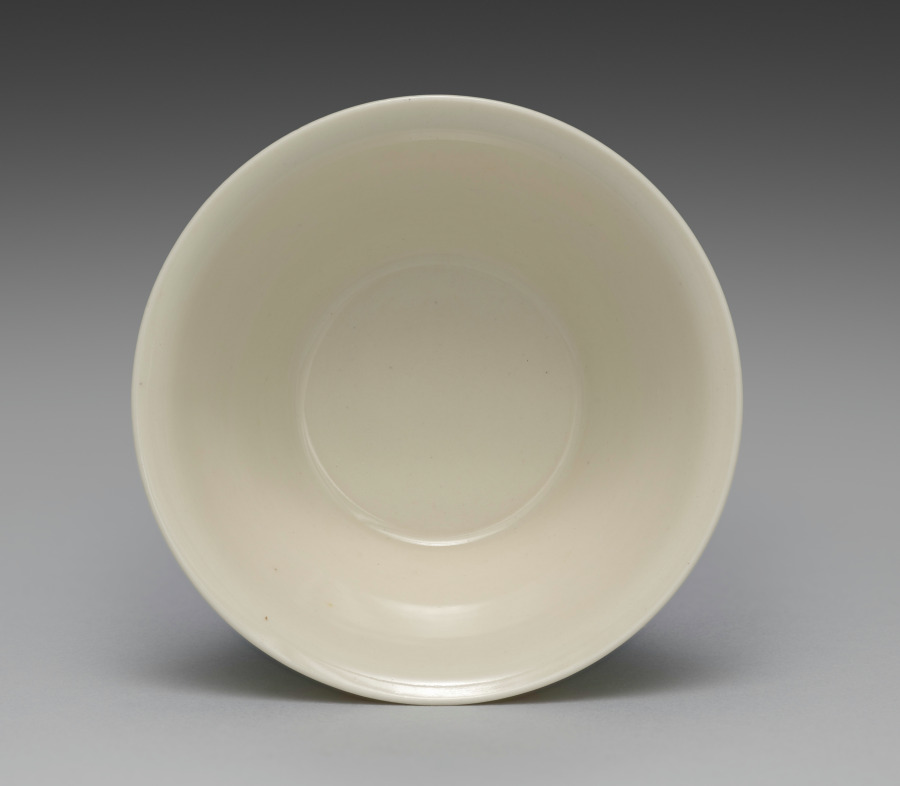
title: Teacup from Teacups with Floral Band Motif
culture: Japan, Meiji period (1868–1912)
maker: Seifū Yohei III (Japanese, 1851–1914)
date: 1893–1914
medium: One from a set of five cups; porcelain with incised decoration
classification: Ceramic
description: The five sencha teacups in this set are decorated with incised flowers and dots between a double band at the top and a single band at the bottom. They are in Yohei III’s creamy taihakuji body and glaze. In their motifs, they are quite similar to an incense burner by Yohei III (see CMA 2022.180), but the flowers are even more simple in design, with no open circle at the center. A label affixed to the side of the box refers to them as “sencha cups in emulation of Korean white [ware].” The reference to Korean ware indicates that even though Yohei was more directly inspired by Qing dynasty wares from the Dehua kilns in Fujian Province in developing his porcelain clay and glaze for works such as these, the general understanding of the continental models still placed them, at least in terms of color, among pieces broadly associated in Japan with Korean white wares. The delicate cups are thinly potted, so they have a highly desirable translucency.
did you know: The delicate cups in this set are thinly potted, so they have a highly desirable translucency.